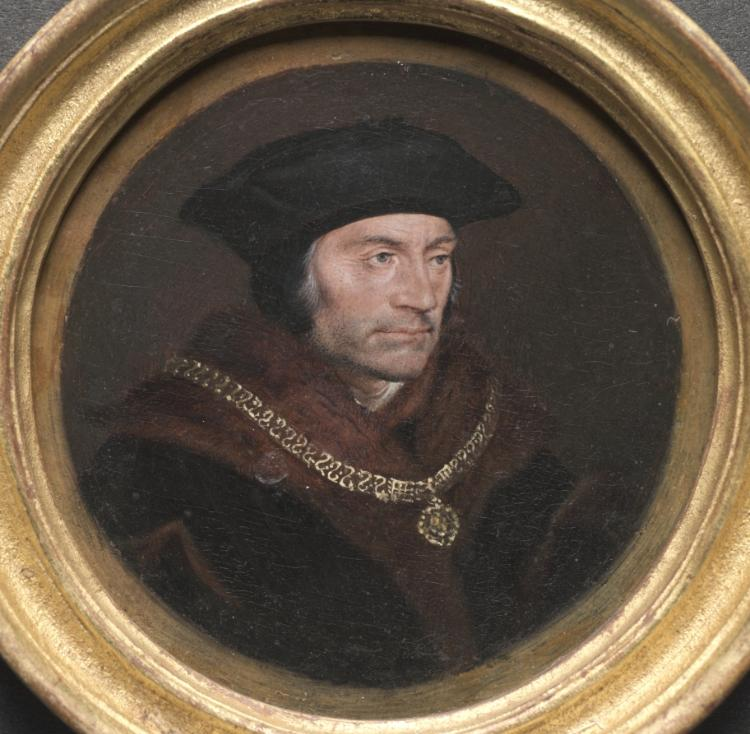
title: Sir Thomas More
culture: Germany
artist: follower of Hans Holbein the Younger (German, active England and Switzerland, 1497/98–1543)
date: 1600s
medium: oil on wood in a gilt wood frame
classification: Portrait Miniature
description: One of the most original of Renaissance thinkers, an influential politician at the court of Henry VIII, and, since 1935, a saint in the Roman Catholic Church, Sir Thomas More also played an important role in the development of English portraiture through his patronage of Hans Holbein the Younger. Here More wears a so-called livery chain, a mark of his service to Henry VIII. He would eventually be beheaded in 1535, when he refused to support the king’s divorce and breach with the Catholic church. This miniature painted by a later follower of Holbein attests to the enduring resonance of More’s image and legacy.